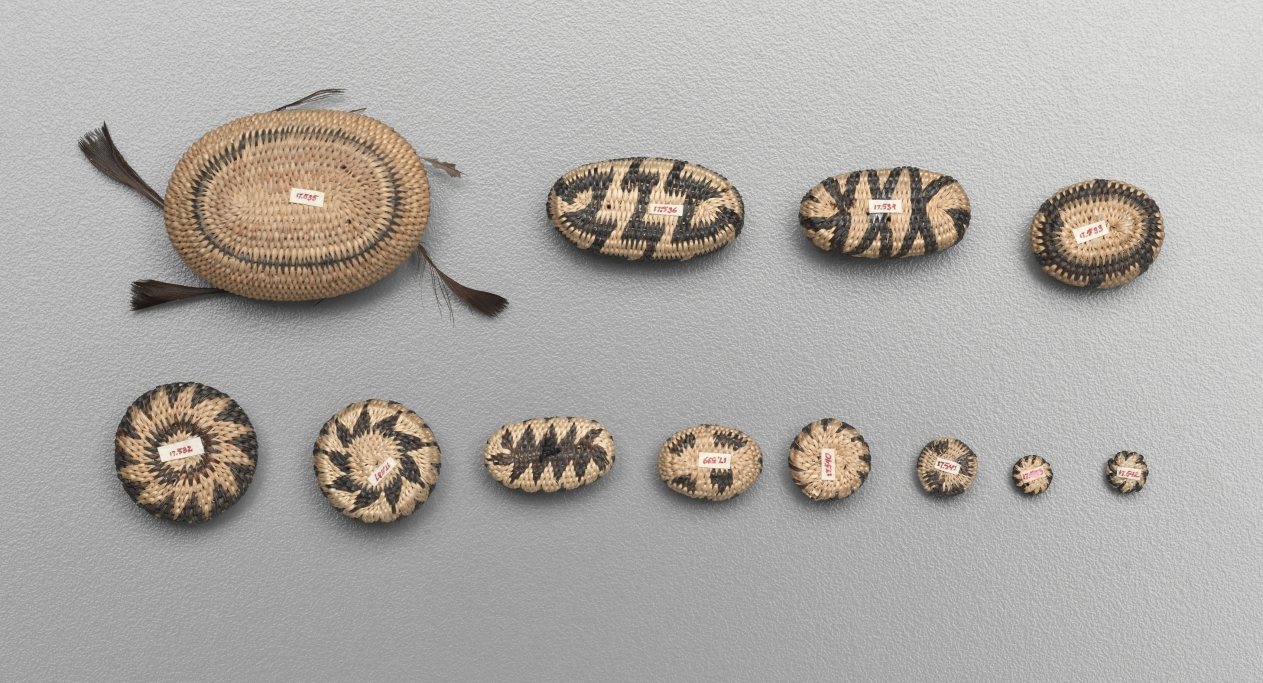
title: Miniature Rhomboidal Basket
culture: California, Pomo, late 19th-early 20th century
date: late 1800s-early 1900s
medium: plant materials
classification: Basketry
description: Miniature baskets were made to demonstrate the basket-maker’s virtuoso skill, and these tiny marvels seem to be no exception—the smallest are just a few millimeters wide but still patterned. For such fine work, dexterity was required as much for preparation of materials as for weaving.